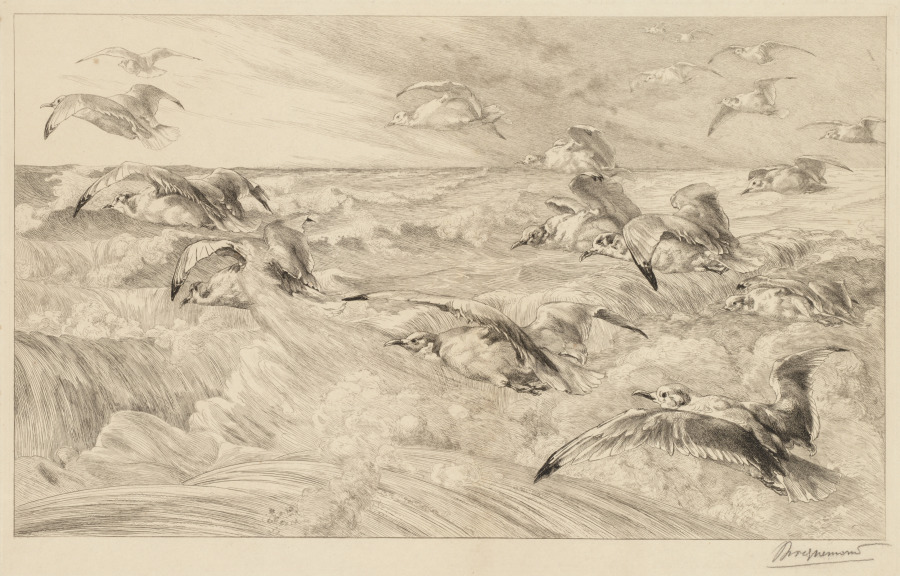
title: Seagulls (Les Mouettes)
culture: France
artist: Félix Bracquemond (French, 1833–1914)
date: c. 1882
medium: Etching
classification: Print